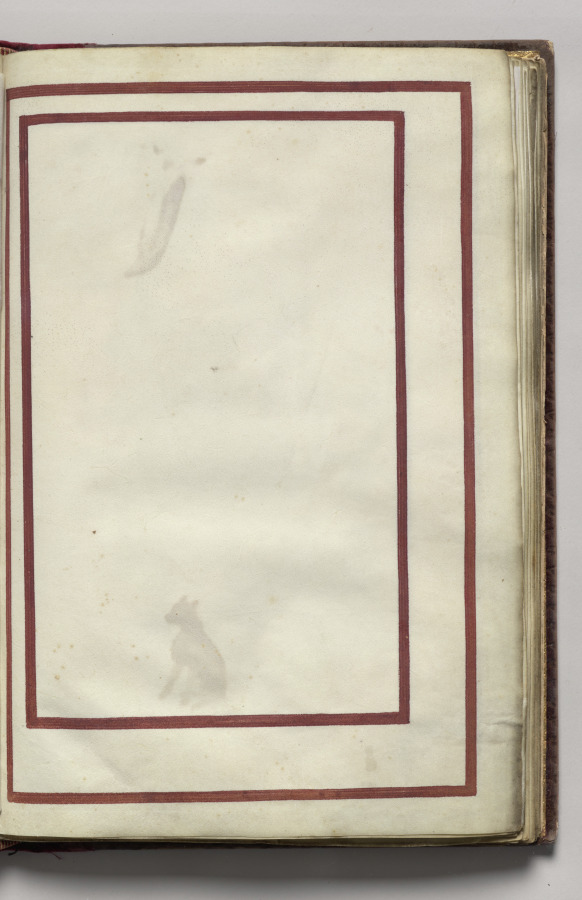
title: Border, folio 9 (recto), from Florilegium (A Book of Flower Studies)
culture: France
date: 1608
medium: watercolor, ink, silver and gold over occasional traces of pencil, on vellum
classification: Bound Volume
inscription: Dated: Poitiers 1608 (on frontispiece) Signed: On frontispiece in black ink, lower right: Van Kuyk Notation on drawing: Frontispiece: in pencil, lower margin: * élève de Van Kessel, peintre flammand (* in pencil also appears in front of Van Kuyk's name).